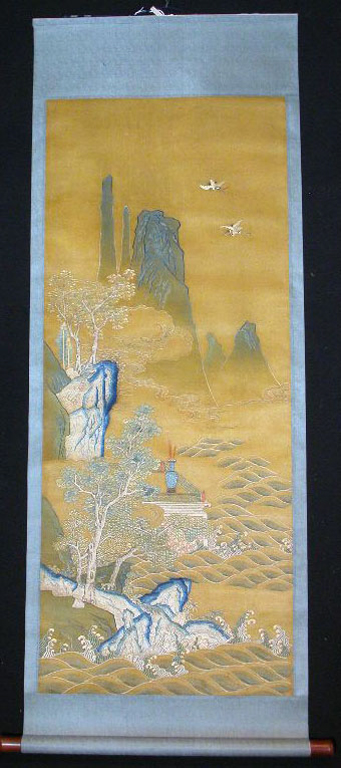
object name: Textile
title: Scroll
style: qing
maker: China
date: Qing dynasty (1644–1911), c. 1840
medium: Mount and lower scroll bar fragments: silk, 4:1 satin damask weave; center panel: silk, warp-float faced 7:1 satin weave; embroidered with silk in satin and stem stitches; couching and laidwork; painted; cord: rayon, braid over cotton cores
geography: China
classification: textile; needlework (visual works); weaving